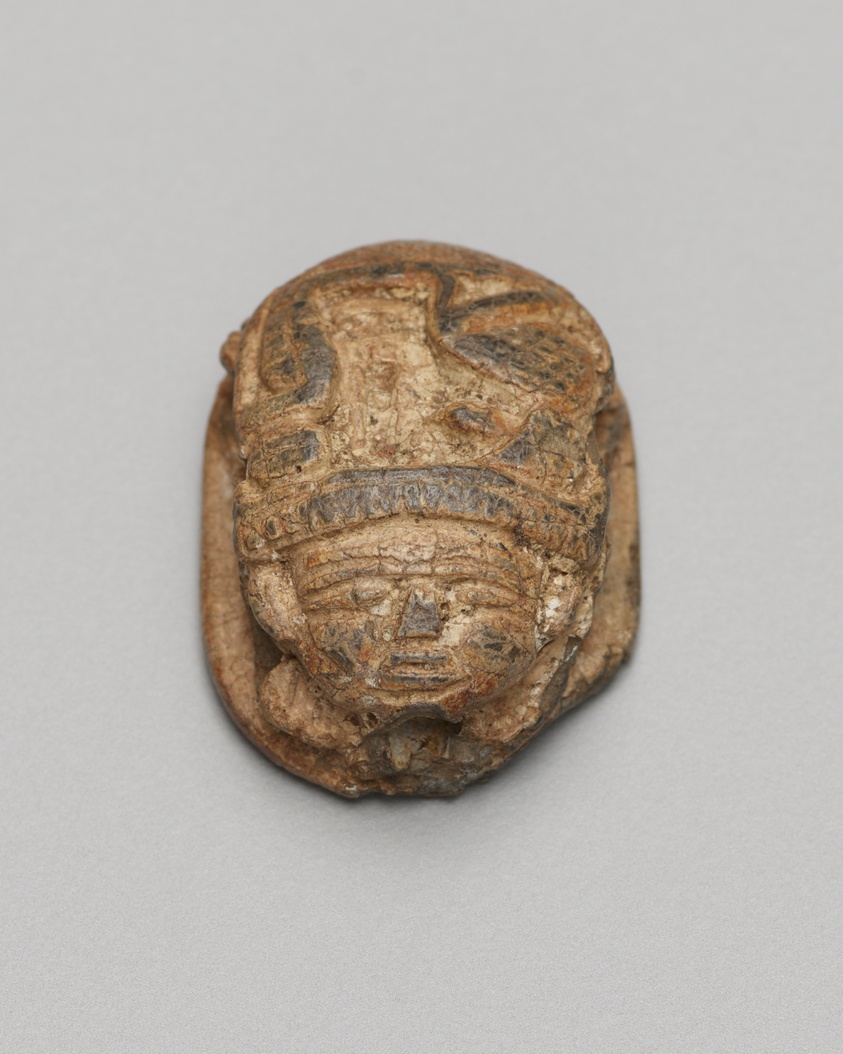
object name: Costume and Accessories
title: Scarab: Inscription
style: middle kingdom, egyptian, ancient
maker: Egyptian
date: Middle Kingdom (about 2055-1650 BCE)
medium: Steatite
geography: Egypt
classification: scarab; ancient art; costume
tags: Hieroglyphs